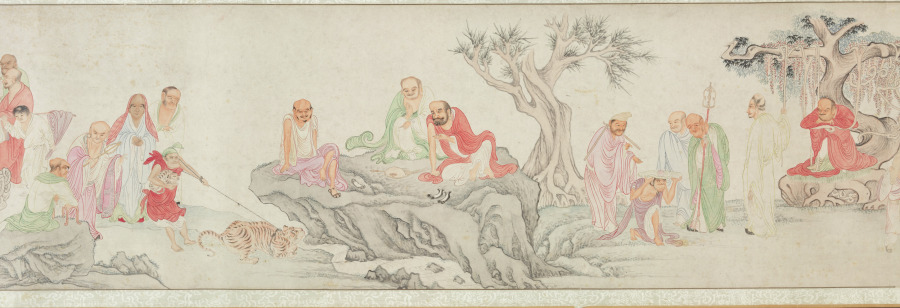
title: The Five Hundred Arhats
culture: China, Ming dynasty (1368–1644)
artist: Wu Bin (Chinese, active c. 1591–1626)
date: 1591–1626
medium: Handscroll; ink and color on paper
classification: Painting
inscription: 枝隱頭陀吳彬齋心拜寫 [印]吳彬之印; 文中父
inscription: 7 seals of Qianlong emperor (r. 1736–95): Gu xi tian zi 古希天子; Shou 壽; Qianlong jian shang 乾隆鑑賞; San xi tang jing jian xi 三希堂精鑑璽; Yi zi sun 宜子孫; Tai shang huang di zhi bao 太上皇帝之寳; Qian qing gong bao 乾清宮寶.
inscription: 6 seals of Cheng Qi 程琦 (1911–1988): Ke an geng zi wu shi yi hou suo de ming ji 可菴庚子五十以後所得名跡; 5 other Cheng Qi seals.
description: More than 66 feet long, this handscroll depicts 447 luohans, 72 attendants, and the bodhisattva of compassion at its very end. Luohans (arhats in Sanskrit), disciples of the Buddha and protectors of the Buddha’s law, possess supernatural powers and take on myriad external appearances. The amusing assortment of characters are engaged in an array of religious, secular, and miraculous activities. The painter used stylistic features borrowed from earlier artists, carefully controlled lines, and refined coloring. Wu Bin was a lay Buddhist and depicting this sort of image was part of a religious practice seeking understanding of the Buddha’s teaching.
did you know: Far advanced on the path to enlightenment, arhats have the capacity to tame tigers, free dragons, and to float on water or in the air.